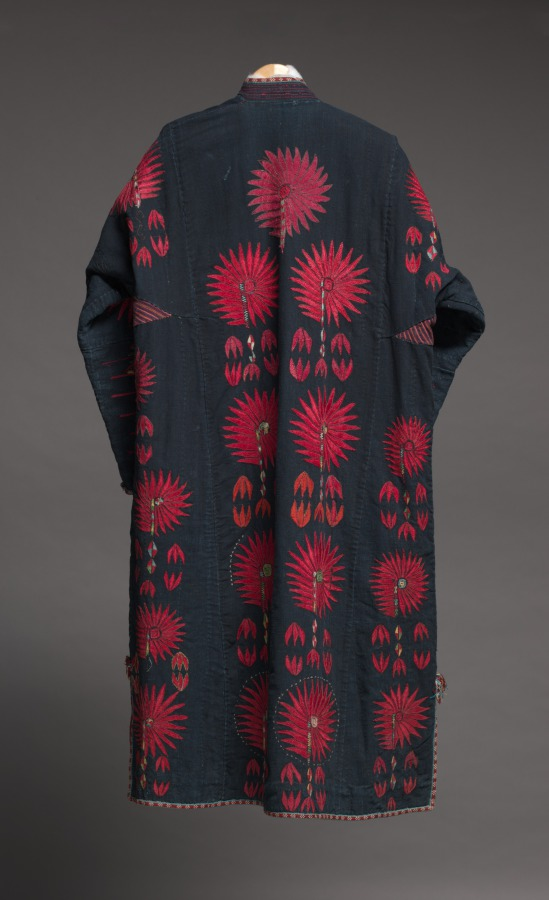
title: Woman's robe with crimson flora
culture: Uzbekistan, Karakapak Republic, Khorezm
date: late 1800s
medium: Plain weave: cotton (hand-spun, indigo dyed), embroidery: silk, cotton; tablet-woven (edges)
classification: Garment